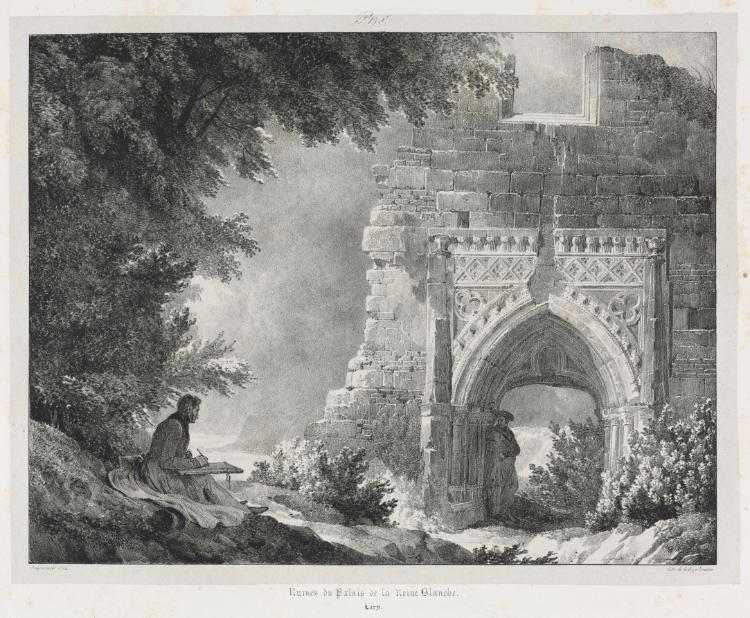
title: Picturesque and Romantic Journeys in Old France: Ruins of the Palace of the White Queen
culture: France, 19th century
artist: Alexandre-Evariste Fragonard (French, 1781–1850)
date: 1824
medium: lithograph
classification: Print